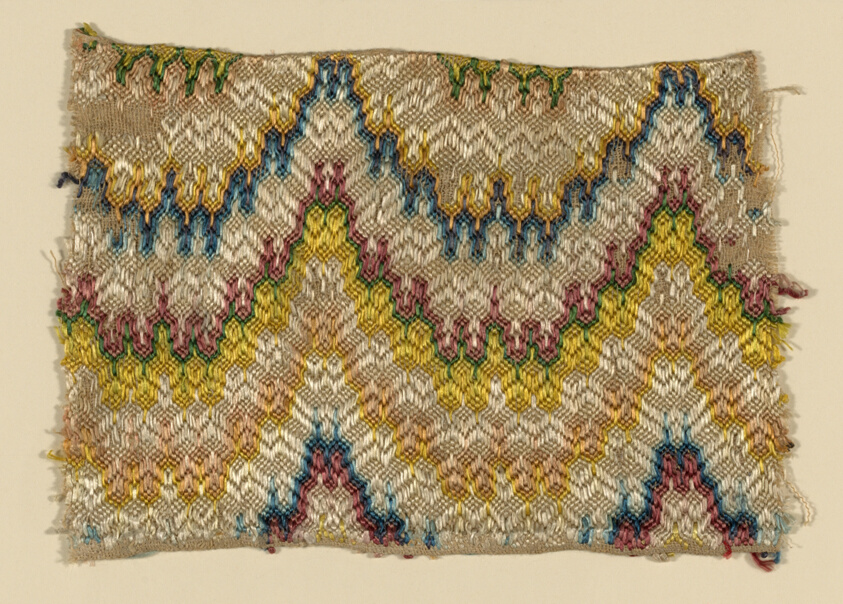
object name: Textile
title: Fragment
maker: Italy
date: 17th century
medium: Linen, plain weave; embroidered with silk floss in a variation of flame stitch (Irish stitch)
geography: Italy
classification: textile; weaving; needlework (visual works)